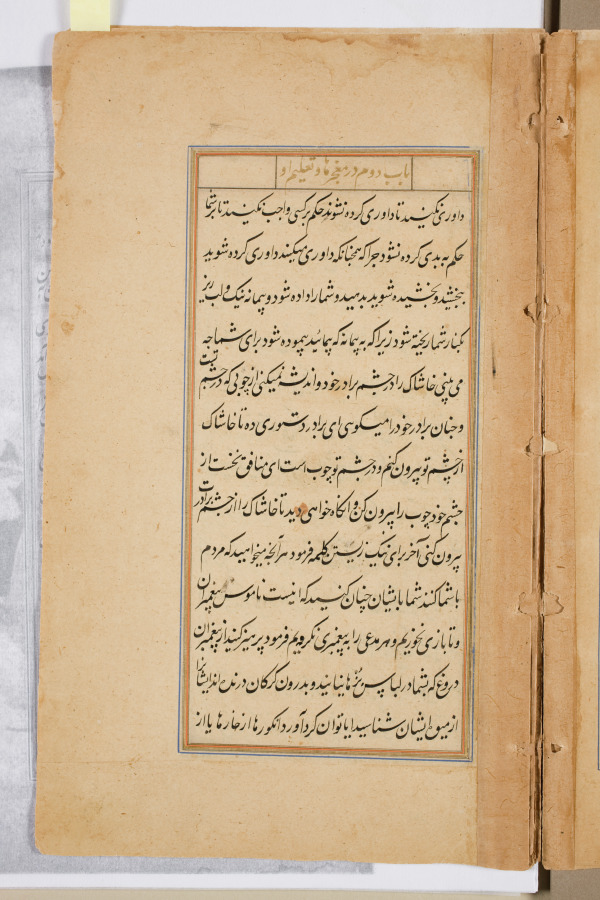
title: Text page from a Mirror of Holiness (Mir’at al-quds) of Father Jerome Xavier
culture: Mughal India, Allahabad, made for Prince Salim (1569–1627)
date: 1602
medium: Ink and gold on paper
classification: Manuscript